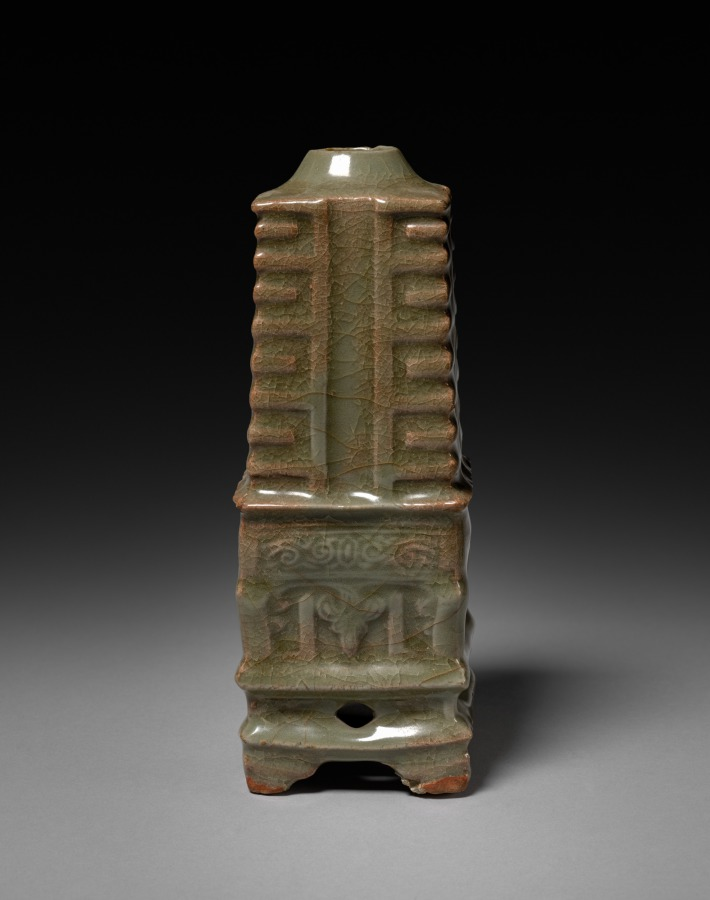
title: Vase in Shape of Cong: Southern Celadon Ware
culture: China, Zhejiang province, Yuan dynasty (1271-1368)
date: 1271–1368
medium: glazed buff stoneware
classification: Ceramic